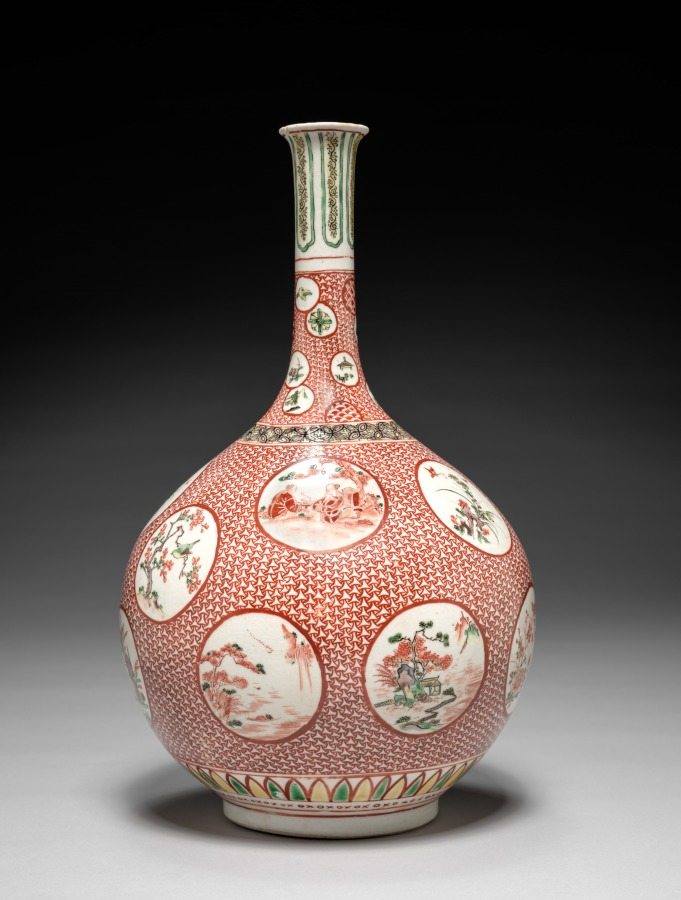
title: Vase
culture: Japan, Edo period (1615–1868)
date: late 1600s-early 1700s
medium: porcelain with decoration in colored enamels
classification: Ceramic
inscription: character "Fuku" (well-being) on base in black with green overglaze.